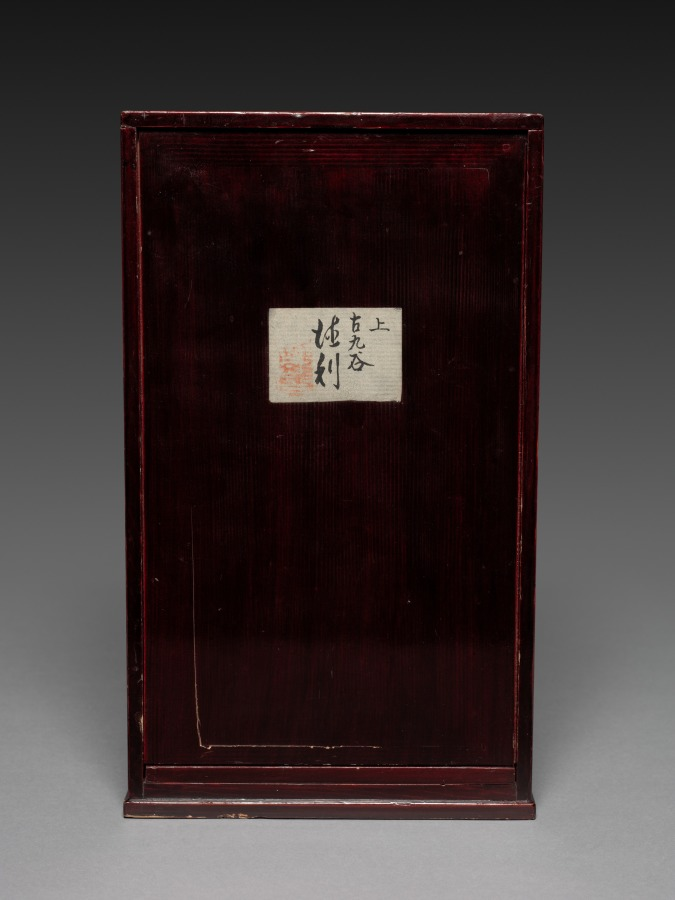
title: Wine Bottle with Plum and Pine Tree Design: Ko Imari Type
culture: Japan, Edo period (1615–1868)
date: late 1600s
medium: porcelain with underglaze enamel decoration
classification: Ceramic